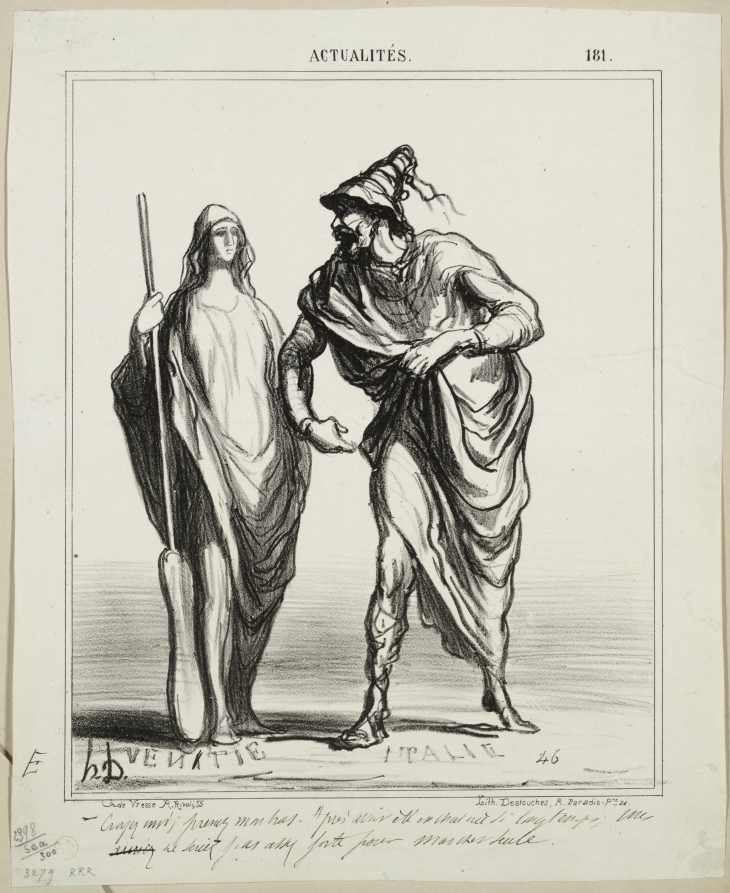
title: Trust me! Take my arm...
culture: France, 19th century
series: News of the Day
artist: Honoré Daumier (French, 1808–1879)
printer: Destouches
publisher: Arnaud de Vresse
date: 1866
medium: lithograph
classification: Print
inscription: Lower margin, in brown ink: - Croyez moi! prenez mon bras. Après avoir été enchainée si longtemps, vous / asuirez? [crossed out] ne seriez pas assez forte pour marcher seule. ; Lower left corner, red stamp ; in ink: E ; in pencil: 2398/sea/300 / 3279 RRR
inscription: Above image, printed: ACTUALITÉS. / 181. ; Lower margin, printed: A. de Vresse, R. Rivoli, 55. / Lith. Destouches, R. Paradis. Pre. 28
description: This print was published in Le Charivari (September 22, 1866) as plate 181 from the series News of the Day.